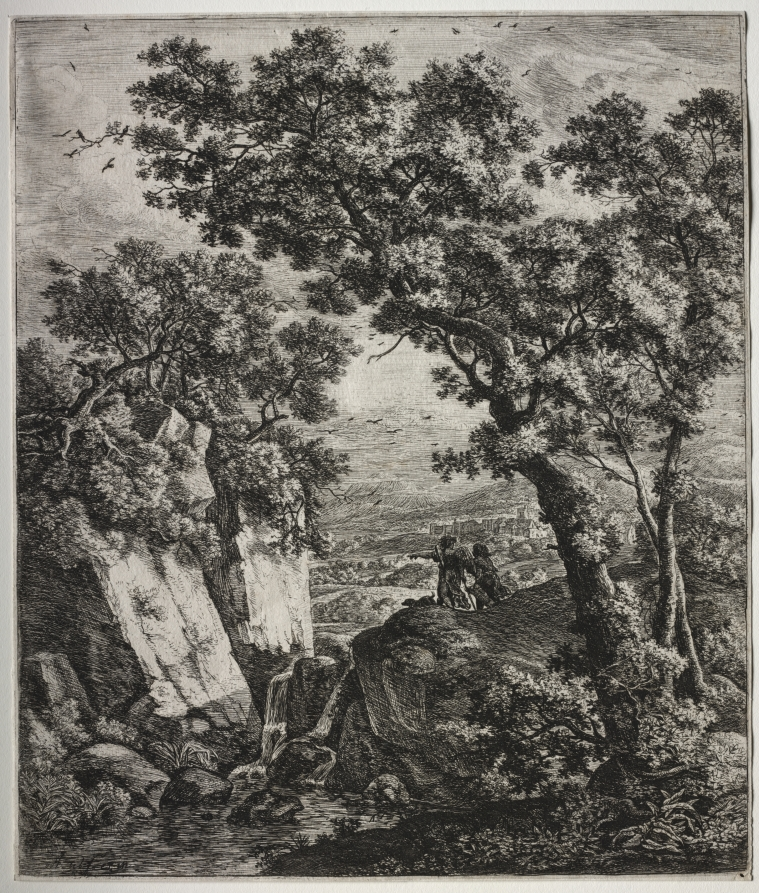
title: Six large upright landscapes with scenes from the Old Testament: Tobias and the Angel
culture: Netherlands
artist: Anthonie Waterloo (Dutch, 1609/10–1690)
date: 1640–90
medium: etching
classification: Print